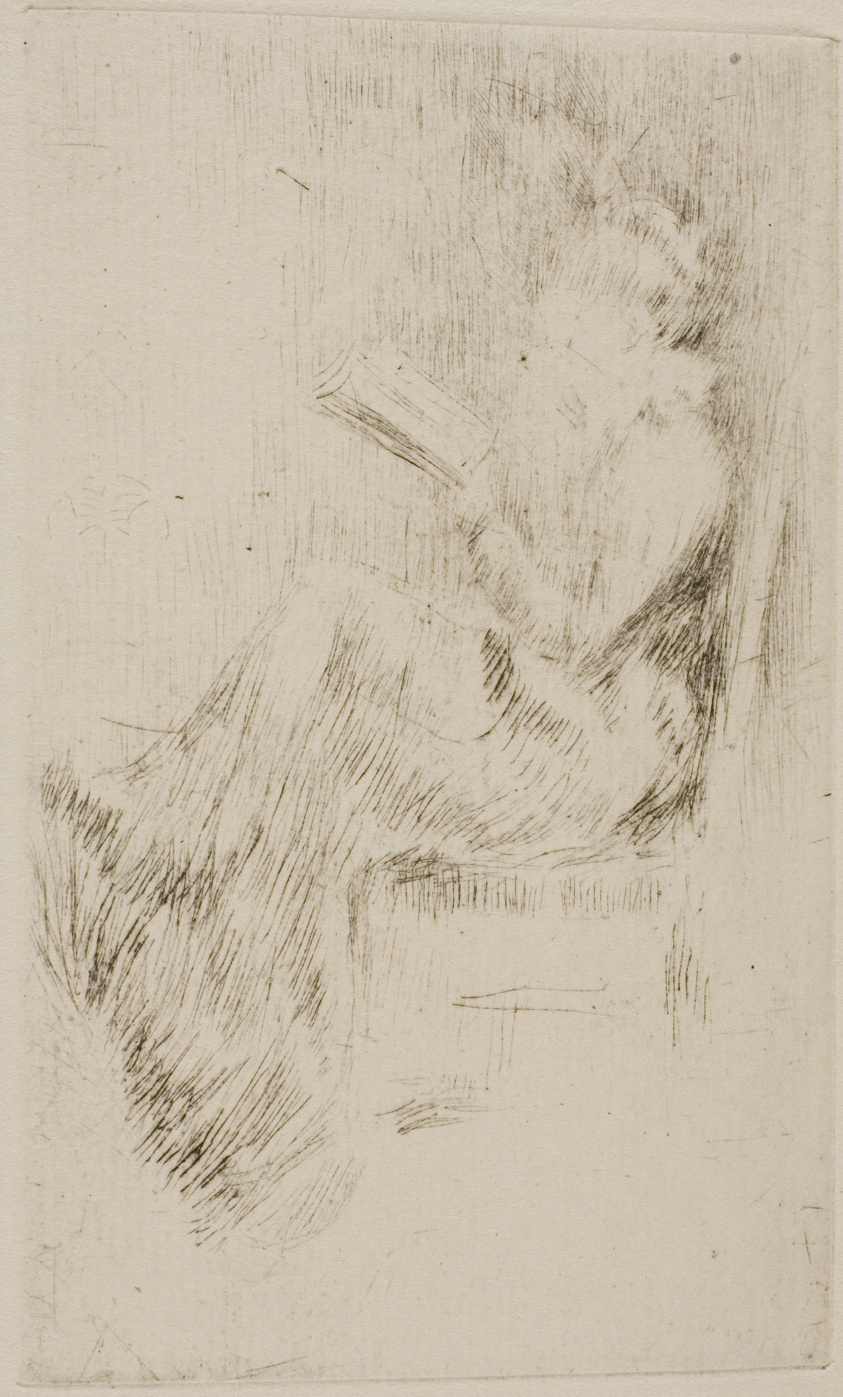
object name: Print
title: Reading a Book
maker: James McNeill Whistler (American, 1834-1903)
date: 1873/74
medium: Drypoint, with drypoint cancellation, in black ink on ivory laid paper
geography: United States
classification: drypoint; prints and drawing; book; print; paper